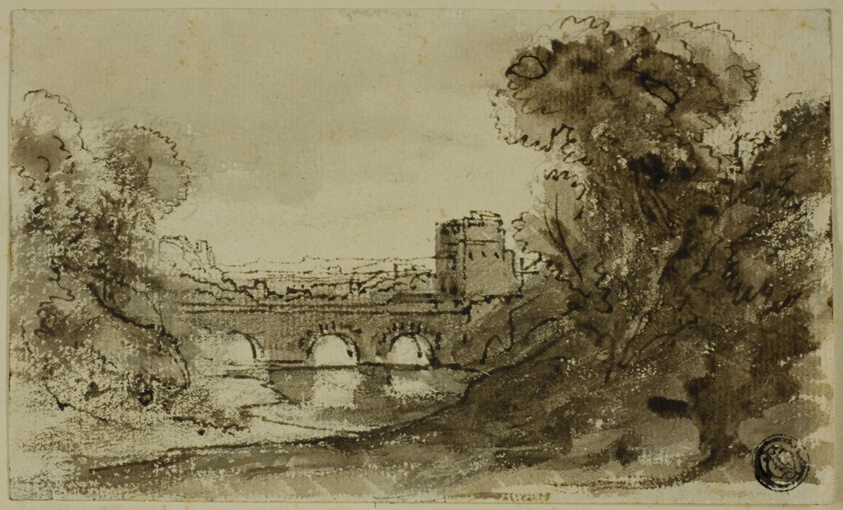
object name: Drawing and Watercolor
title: Italianate River Landscape with Bridge with Tower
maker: Possibly after Claude Lorrain (French, 1600-1682); or possibly attributed to Gaspar van Wittel (Flemish, 1652/3-1736); or in the style of Richard Wilson (English, 1714-1782)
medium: Pen and brown ink and brush and brown wash, over graphite, on cream laid paper, tipped on to cream card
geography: France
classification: pen and ink drawings; drawings (visual works); prints and drawing